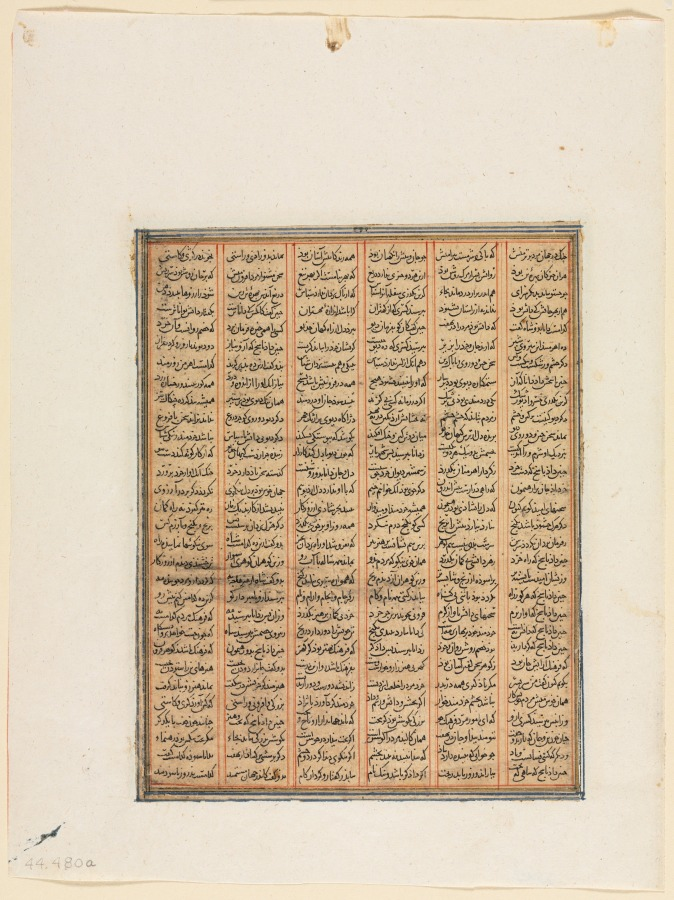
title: The Reign of Nushirwan, The Combat between the Khan of Chin and the Haitalians (recto) from a Shahnama (Book of Kings) of Firdausi (940–1019 or 1025)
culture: Iraq, Baghdad, Ilkhanid period (1256-1353)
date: c.1299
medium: ink and opaque watercolor on paper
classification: Manuscript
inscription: script: Naskh